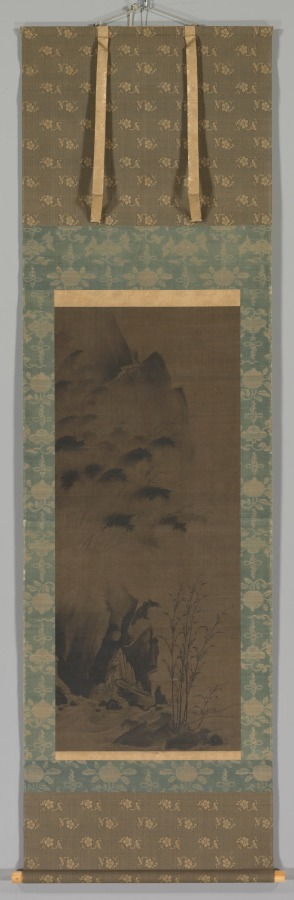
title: Bamboo in Rain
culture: Japan, Muromachi period (1392–1573)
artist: attributed to Genga (Japanese)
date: early 1500s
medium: hanging scroll; ink on silk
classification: Painting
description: East Asian paintings from China, Korea, and Japan were frequently conceived as sets of multiple images. These sets might have been composed for specific palace or temple rooms, or to portray a specific theme, such as the four seasons. Over time, the original intent of such sets is often lost through damage, changes in ownership, or a variety of other reasons. The identity of the artist can also be lost, but then, sometimes, retrieved. This pair of ink paintings has traditionally been labeled as Japanese and attributed to the 16th-century painter Genga. Since there are no seals or signature of the artist on the painting, this attribution was based on comparisons of brush style with paintings known to be by Genga. More recent study indicates that while the 16th century is an appropriate time frame for the pair, the precise cultural identity of the artist is not certain after all. The dark, eccentric shapes of the rocks and bamboo clusters and the dramatic tonal contrasts evident throughout the composition point to either Korean authorship or influence upon a Japanese painter of the period.